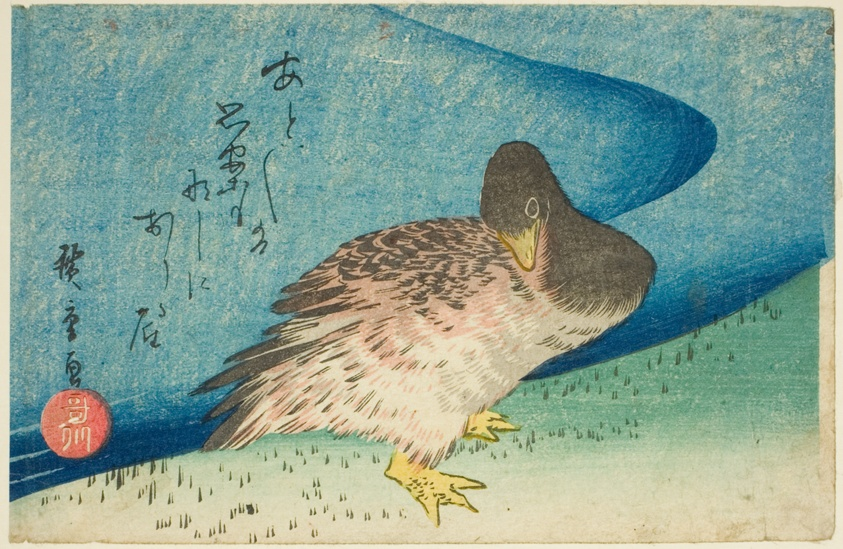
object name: Print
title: Goose on riverbank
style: Japanese (culture or style)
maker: Utagawa Hiroshige 歌川 広重; Japanese, 1797-1858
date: c. 1833/34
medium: Color woodblock print; koban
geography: Japan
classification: woodblock print; print; asian art